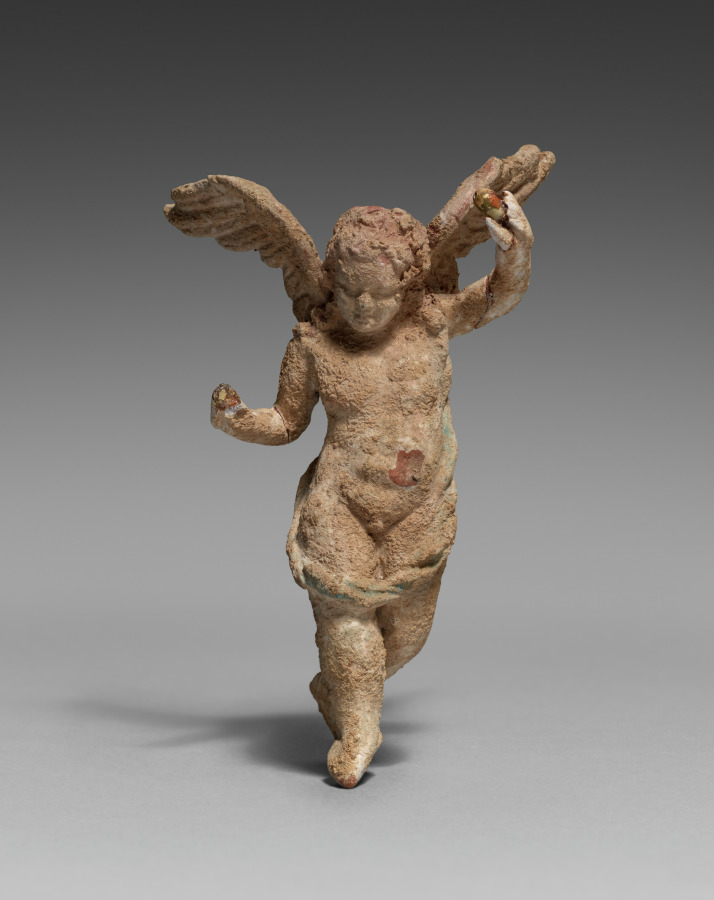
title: Figurine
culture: Greece, Myrina, Hellenistic period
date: late 400s–300s BCE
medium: terracotta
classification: Sculpture